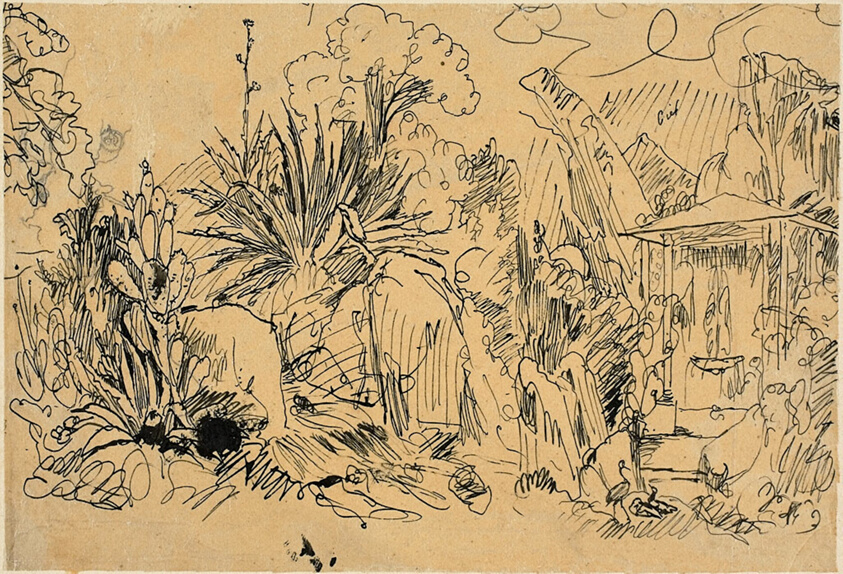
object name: Drawing and Watercolor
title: African Village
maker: Rodolphe Bresdin (French, 1825-1885)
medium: Pen and black ink over graphite, on tan tracing paper, laid down on buff wove paper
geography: France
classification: pen and ink drawings; drawings (visual works); prints and drawing